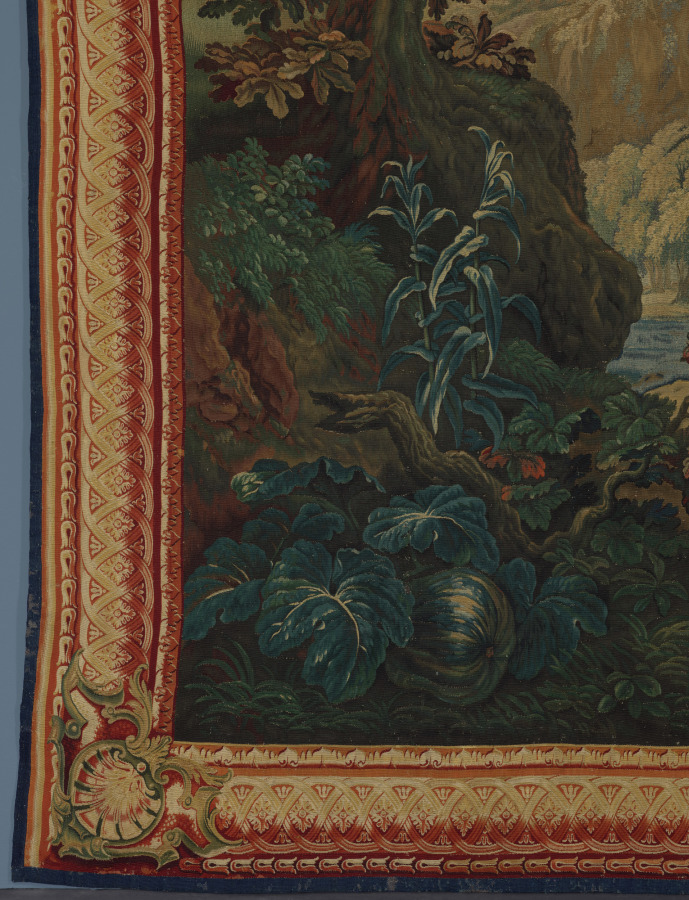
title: Apollo and the Serpent Python (from Set of Ovid's Metamorphoses)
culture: France, 18th century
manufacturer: Gobelins Manufactory (France, Paris, est. 1662)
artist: after Nicolas Bertin (French, 1668–1736)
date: 1700–1730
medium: tapestry weave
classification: Tapestry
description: Apollo’s dynamic posture with his right arm pulled back and his left holding a bow indicates that he has just shot the arrow piercing the snarling serpent’s throat and body. Apollo’s triumph over powerful Python, the fearsome serpent offspring of Mother Earth or Gaia, boosted his ego tremendously, leading to his tragically unsuccessful pursuit of Daphne. The regally dressed hunter and his prey are seen alone in an environment teeming with natural life that includes a pumpkin patch. In the creation of this textile, the manufacturer used blue and yellow dye to create the color green which has since degraded, causing the pumpkins and their leaves to appear blue.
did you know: During the French Revolution, Gobelins tapestries were sometimes disassembled to harvest the gold threads.